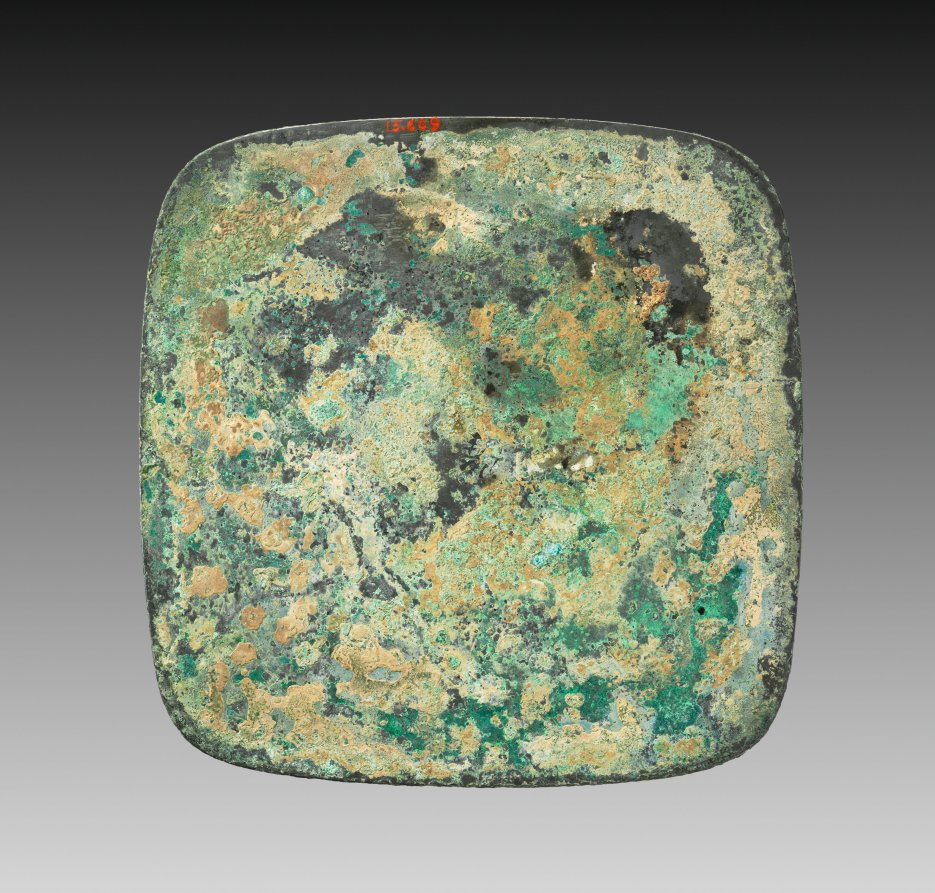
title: Mirror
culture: China, Tang dynasty (618-907)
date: 618–907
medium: bronze with silver inlay in lacquer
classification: Metalwork